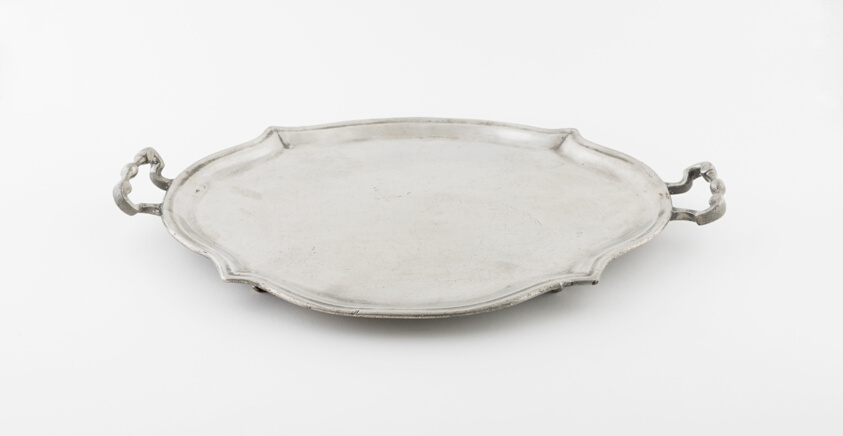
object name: Metalwork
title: Double-handled Footed Tray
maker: Johann Friedrich Seybold; German, active c. 1760-1785; Germany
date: c. 1785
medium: Pewter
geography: Germany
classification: pewter; metalwork; european decorative arts